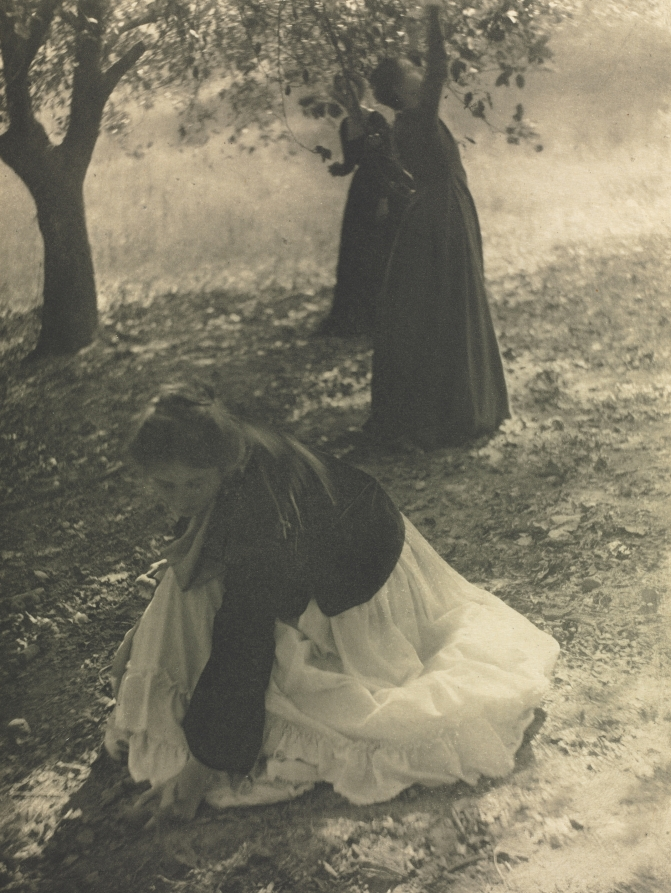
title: Camera Work: The Orchard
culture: America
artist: Clarence H. White (American, 1871–1925)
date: 1905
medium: photogravure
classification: Bound Volume